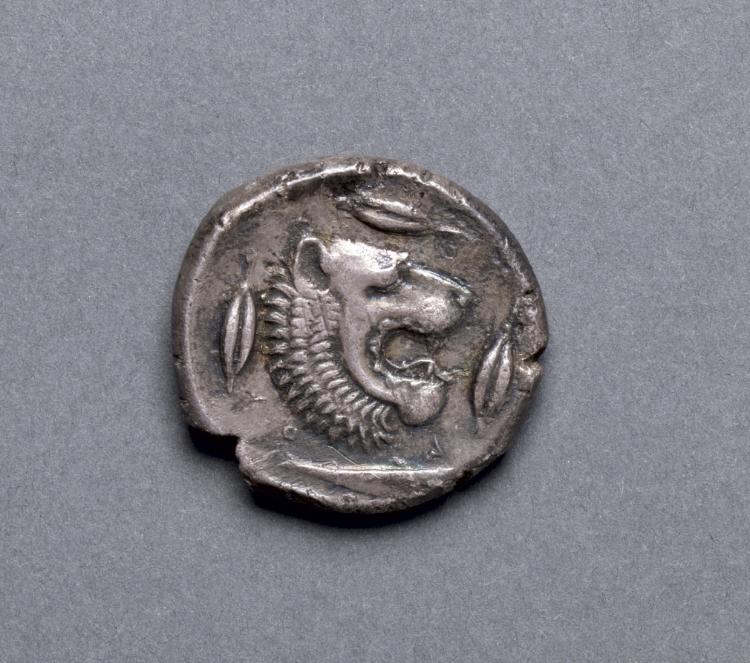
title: Tetradrachm: Head of Lion, Barley, Riverfish (reverse)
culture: Greek, minted at Leontinoi (Sicily)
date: 466–422 BCE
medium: silver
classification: Coins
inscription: [ΛΕ]Ο[ΝΤ]ΙΝΟΝ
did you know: The lion on coins of Leontini marks a pun on the city name.